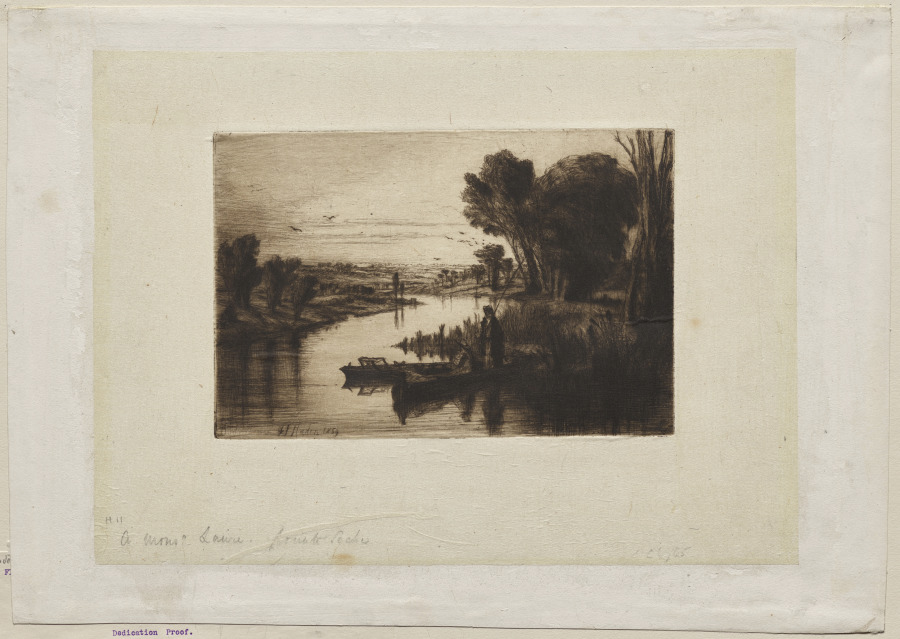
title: Thames Fisherman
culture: England, 19th century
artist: Francis Seymour Haden (British, 1818–1910)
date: 1859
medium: etching and drypoint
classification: Print